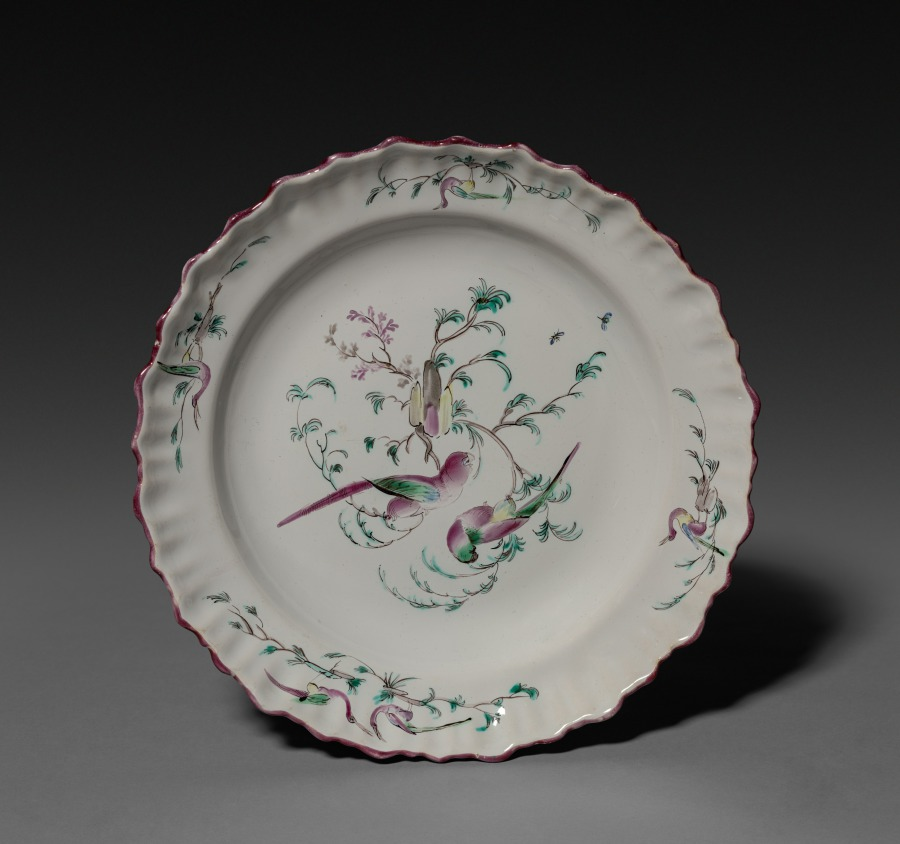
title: Plate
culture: France, Moustier, 18th century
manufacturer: Ferrat Factory (French)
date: c. 1770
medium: faience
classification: Ceramic